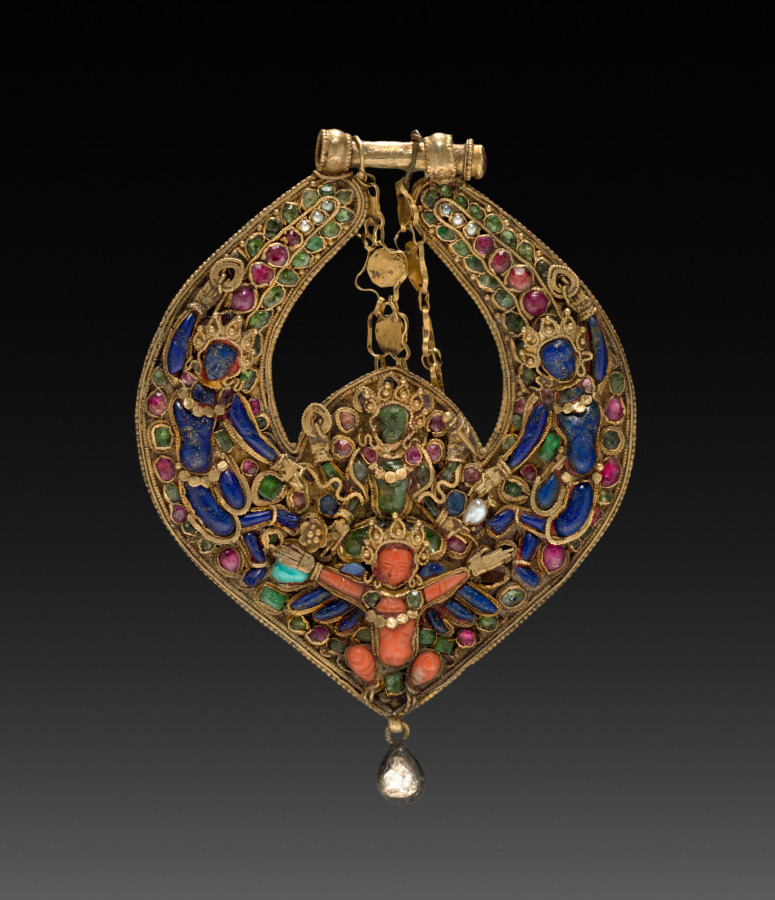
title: Deity Earring with Vishnu on Garuda (front) and chepu (monster mask) (back)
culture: Nepal, Kathmandu Valley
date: 1600s or 1700s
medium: Gold set with precious and semi-precious stones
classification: Jewelry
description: A green Vishnu with four arms, each holding his attributes of discus (his upper right hand), mace (upper left), lotus (lower right), and conch (in pearl, lower left) rides on a coral Garuda with lapis wings, arms outstretched. The blue figures on either side are probably celestial beings praising him in dance postures, with one leg crossed over the other. On the back side, delicate filigree floral scrolls form the backdrop of a protective mask popular in Nepal; a sun over a crescent moon are inlaid above his head.